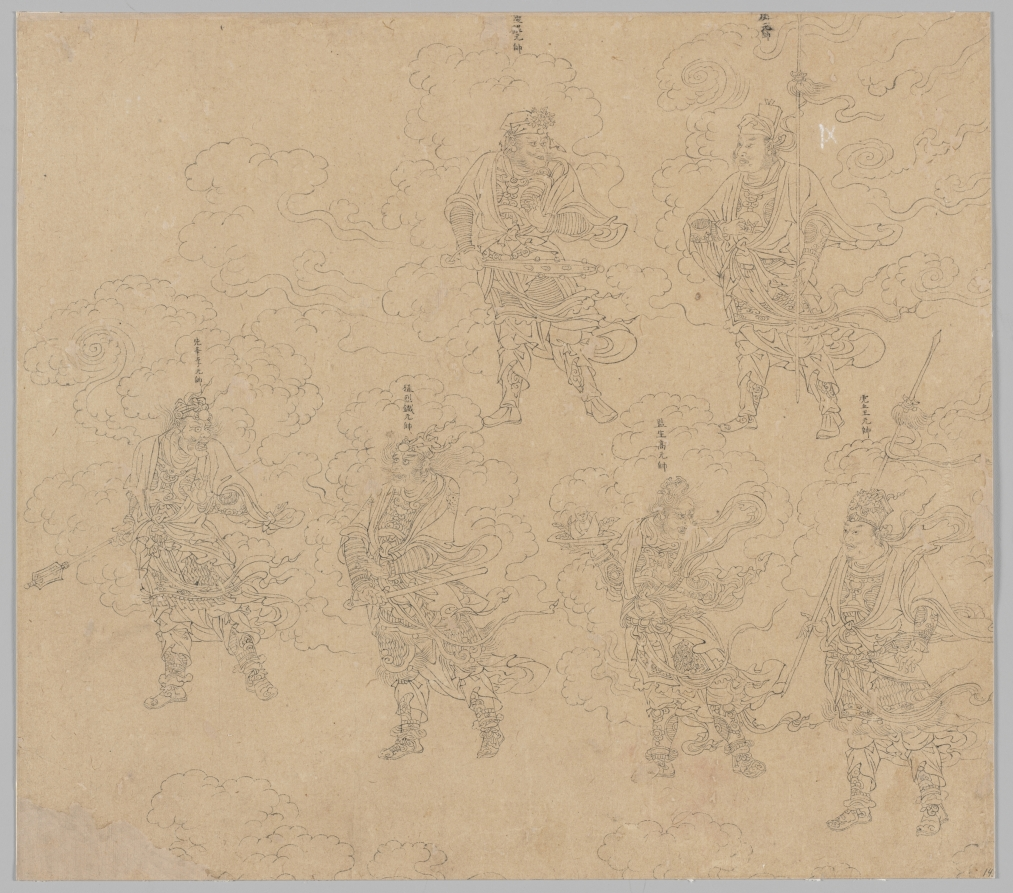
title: Album of Daoist and Buddhist Themes: Procession of Daoist Deities: Leaf 14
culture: China, Southern Song dynasty (1127-1279)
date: 1200s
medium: Album, ink on paper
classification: Painting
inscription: 虎丘王元帥; □□元帥; 監生高元帥; □溫元帥; 猛烈鐵元帥; 先鋒李元帥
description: These six martial figures are Field Marshals in the Daoist pantheon. In the lower row from left to right are Field Marshals Li Feng 李封, Tie Tou 鐵頭, Gao Tong 高銅, and Wang Tie 王鐵. Field Marshal Wen Xiong 溫瓊 is on the top left. The inscription identifying the final field marshal has been trimmed off, so his identity is unclear.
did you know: A baby is nestled in a blossom on the tray that Field Marshal Gao is holding.